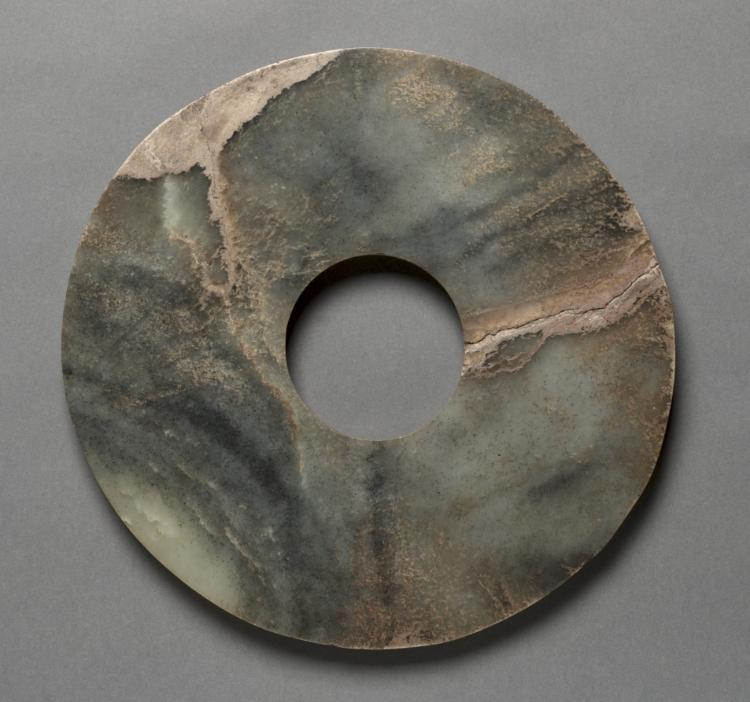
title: Perforated Disc (pi)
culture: China, Neolithic period (3000s–2000s BCE)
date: 3000–2000 BCE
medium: jade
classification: Jade